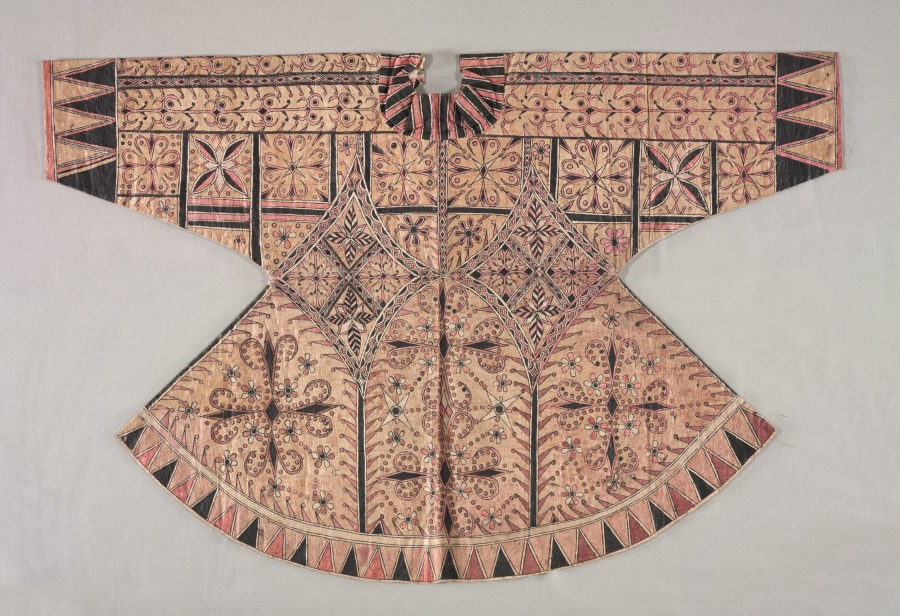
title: Jacket and Skirt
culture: Indonesia, Sulawesi (Celebes), 19th century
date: 19th century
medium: tapa cloth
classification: Garment